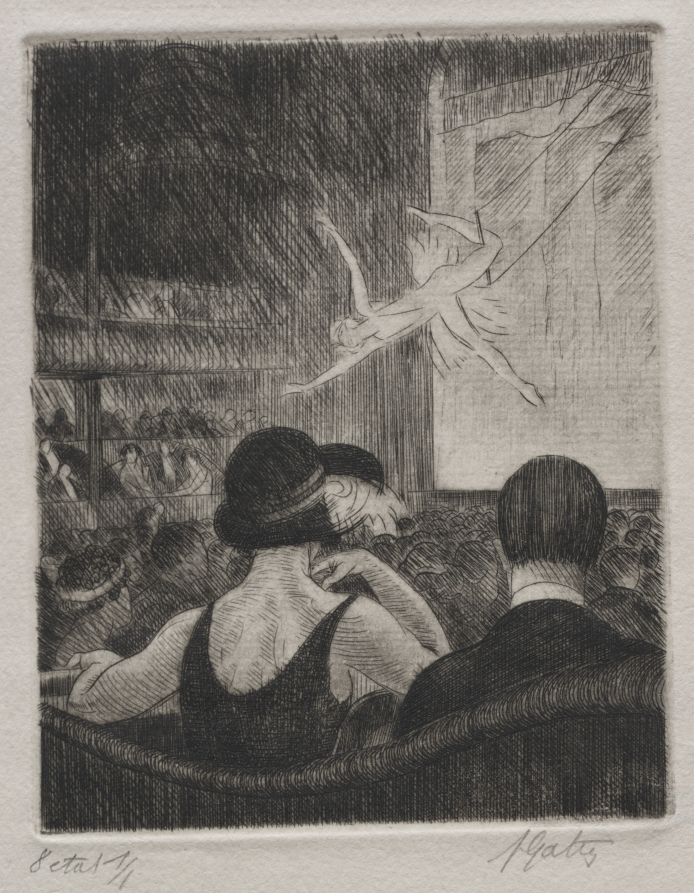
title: Acrobat at the Music Hall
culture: France, 20th century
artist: Pierre Louis Gatier (French, 1878–1944)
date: c. 1920s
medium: etching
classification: Print